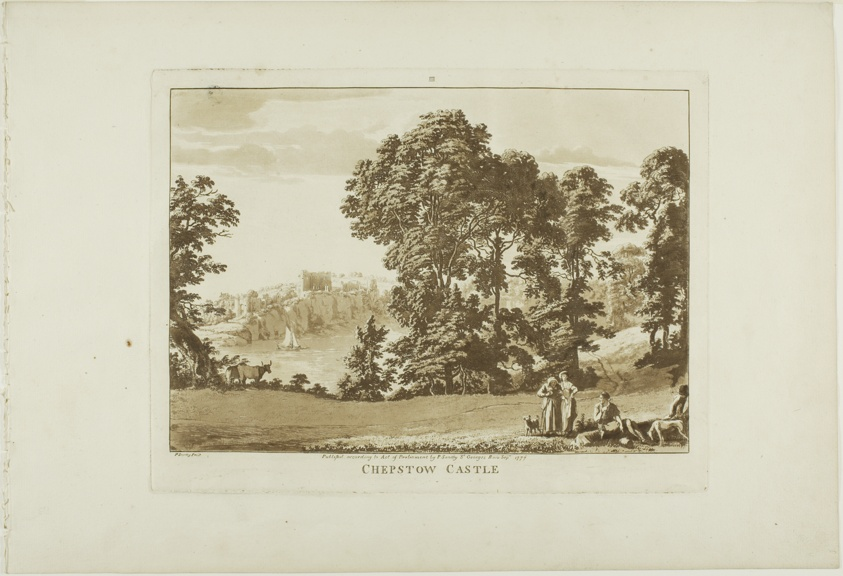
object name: Print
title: Chepstow Castle, plate four from Twelve Views in Wales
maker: Paul Sandby (English, 1731-1809)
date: 1777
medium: Aquatint with etching on cream laid paper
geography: England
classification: aquatint; print; prints and drawing